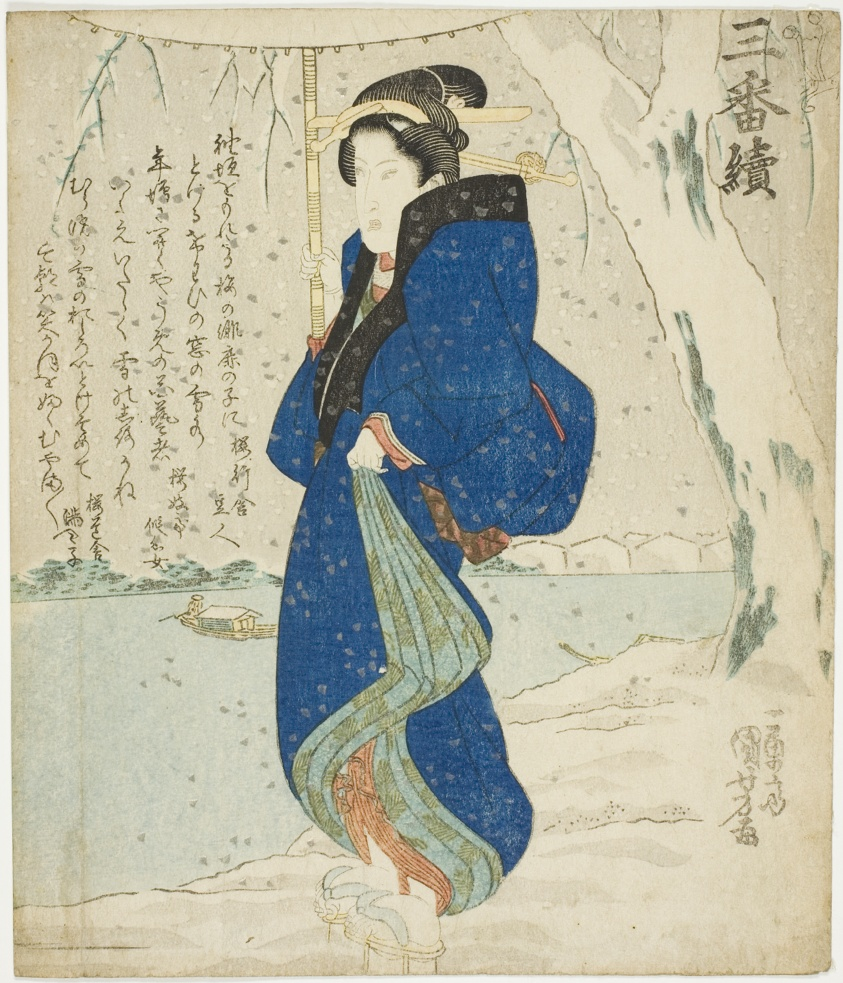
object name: Print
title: Snow: Onoe Kikugoro III, from "A Set of Three (Sanbantsuzuki)"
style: Japanese (culture or style)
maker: Utagawa Kuniyoshi (Japanese, 1787-1861)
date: c. 1829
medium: Color woodblock print; shikishiban surimono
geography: Japan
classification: woodblock print; print; asian art